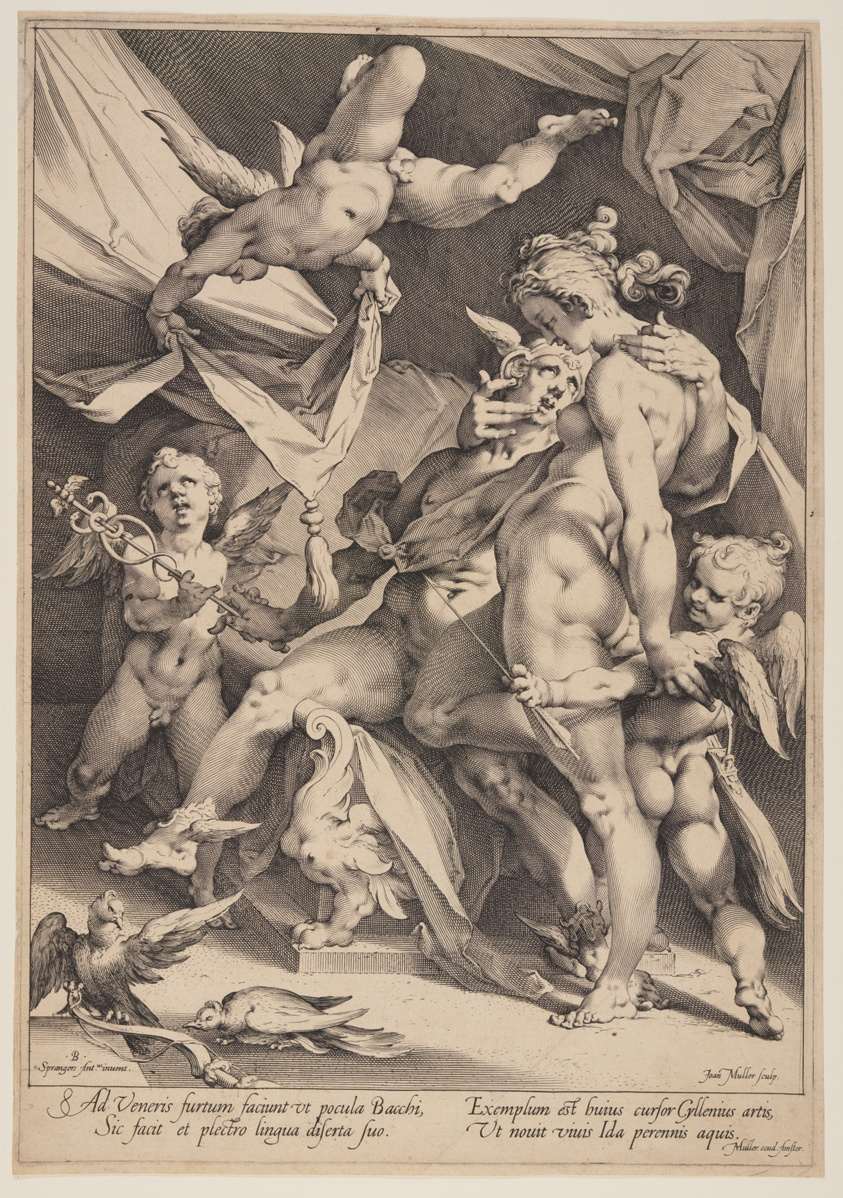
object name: Print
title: Venus and Mercury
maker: Jan Harmensz Muller (Dutch, 1571–1628); after Bartholomeus Spranger (Flemish, 1546–1611)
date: c. 1600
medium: Engraving on ivory laid paper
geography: Netherlands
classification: print; paper; prints and drawing; engraving